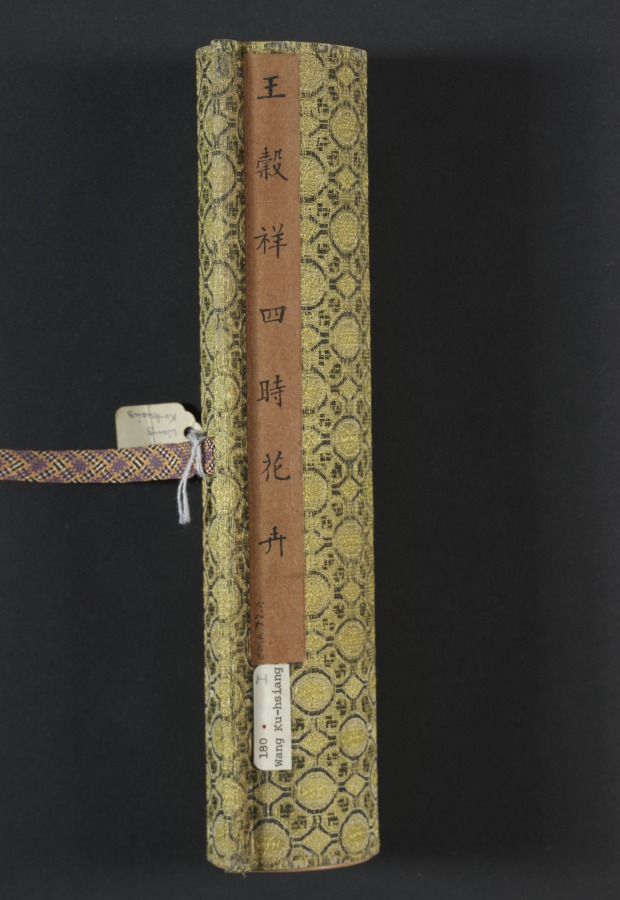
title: Flowers of Four Seasons, with Poems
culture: China, Ming dynasty (1368–1644)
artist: Wang Guxiang (Chinese, 1501–1568)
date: 1531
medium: handscroll; ink and light color on silk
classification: Painting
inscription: Artist's inscription, signature, and 15 seals. Ink Orchids. Sewn as pendants for the man of worth, swaying quiety, fragrance in the valley. [seal] Hsiao-chu ts'un Peony. Wiping his face, the young gentleman Ho [Ho Yen of Wei, Three Kingdoms] appears to have been powdered. His previous life was the perfume-stealing Han Shou [of Chin, 265–419 CE], the fragrance still lingers. [seal] Ts'un-wu chai. Flowering Crab Apple, New Bamboo. Shao-lin [Du Fu, 712–770] had to put down his brush. [Flowering Crab Apple]. Yü-k'o [Wen T'ung, d. 1079) in vain wrote poems about [Bamboo]. [seal] Yu-shih. Lotus Flowers. When she turns her head, half-hidden by a fan, and casts a glance, all the beautiful women become colorless. [seal] K'ang yüeh huai. Loquat. Ripeness in summer. [seal] Lu-chih. Pomegranate Flower. Whenever I remember you I will send my thoughts, but where have you gone--the [skirt] of pomegranate red? [seal] Wu-ho Sheng. Day Lily. Plant the day lily to forget sorrow. [seal] Yu-shih. Chrysanthemum. The untrammelled joy at the eastern fence. [seal] Lu-chih. Begonia. Comparing it to the beauties of Spring, and spreading them out as trimming for the stone steps. [seal] Yu-shih. Hibiscus. In recent years I have always enjoyed looking at flowers; instead of dark red I preferred pink ones. [seal] Jen-sheng i-lou. Narcissus, Camellia. The jade girdle left behind at Lo River. [Narcissus]. The precious pearls glitter before Spring. [Camellia]. [seal] Lu-chih. Heavenly Bamboo (Nandina domestica). A single branch in the wintry season. [seal] K'ang yüeh huai. Plum. Fragrant snow in the Lo-fou Mountains. [seal] Ts'un-wu chai. In the eleventh lunar month of the hsin-mao year of the Jiaqing era [1531], [I] imitated the boneless style of Yüan masters in sketching from life. Guxiang [seals] Yu-shih; Lu-chih. Translated by Wai-kam Ho/Lingyun Shih Liu (1980)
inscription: 2 colophons and 23 additional seals: 1 colophon dated 1632, and 2 seals of Li Jih-hua [Li Rihua] 李日華 (1565–1635); 1 colophon and 2 seals of Xiang Shengmo 項聖謨 (1597–1658); 3 seals of Liang Qingbiao 梁清標 (1620–1691); 6 seals of the Jiaqing 嘉慶 emperor (r. 1796–1820); 9 seals of Ch'eng Ch'i [Cheng Qi] 程琦 (1911–1988)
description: In this painting, flowers are loosely arranged by the seasons: narcissus and peony represent early spring; yellow loquat and lotus, summer; chrysanthemum, autumn; and the plum and evergreen bamboo, winter. The artist added to each flower a poetic line of calligraphy associating each plant with a historic or legendary figure. For example, the chrysanthemum, along with the line “The untrammeled joy at the eastern fence,” refers to the poet Tao Yuanming (died AD 427) who enjoyed chrysanthemums at the eastern fence in his garden. The scroll illustrates Wang Guxiang’s mastery of free brushwork, combining light monochrome ink with transparent colors. In his inscription, Wang says he used the “boneless” style without outlines as developed during the Yuan dynasty (1279–1368). Wang was a native of Changzhou, a city in southeast China known for its rich flora and fauna, and flower-and-bird painting tradition.